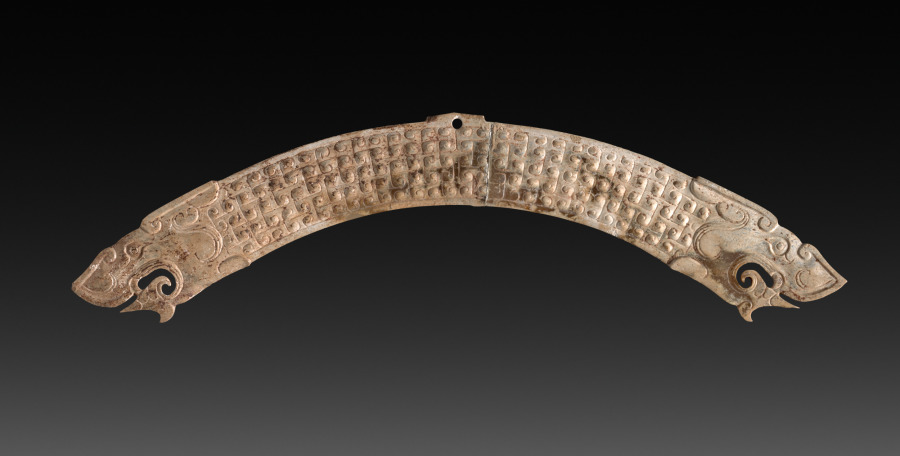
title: Arc-Shaped Pendant (Huangpei)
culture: China, Eastern Zhou dynasty (770–256 BCE), Warring States period (475–221 BCE)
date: c. 400–300 BCE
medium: jade (nephrite)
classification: Jade